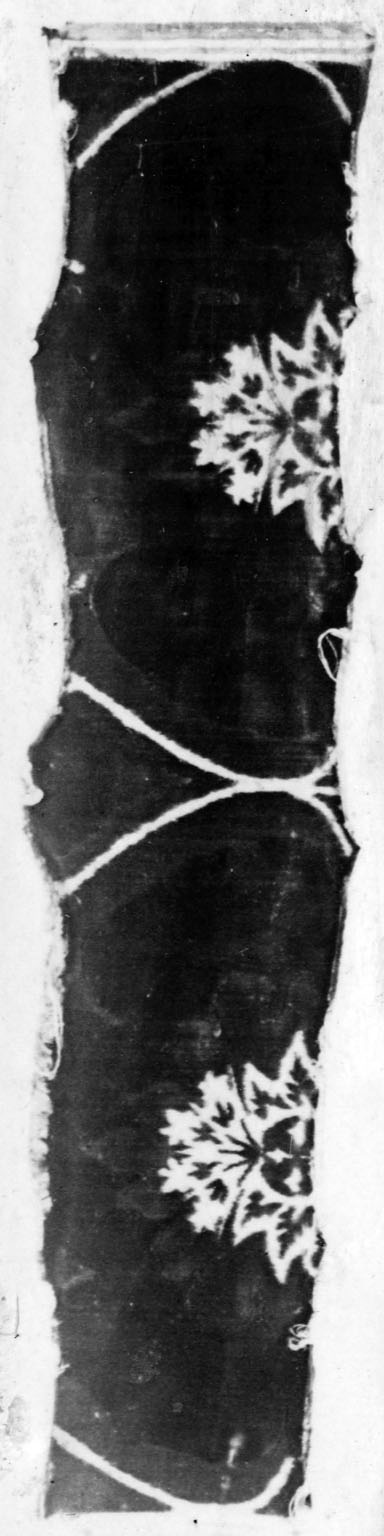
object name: Textile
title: Strip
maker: Italy, Venice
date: 15th century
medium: Crimson cut velvet on red satin ground; pile on pile voided twill velvet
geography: Venice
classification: textile; weaving; weaving - velvet